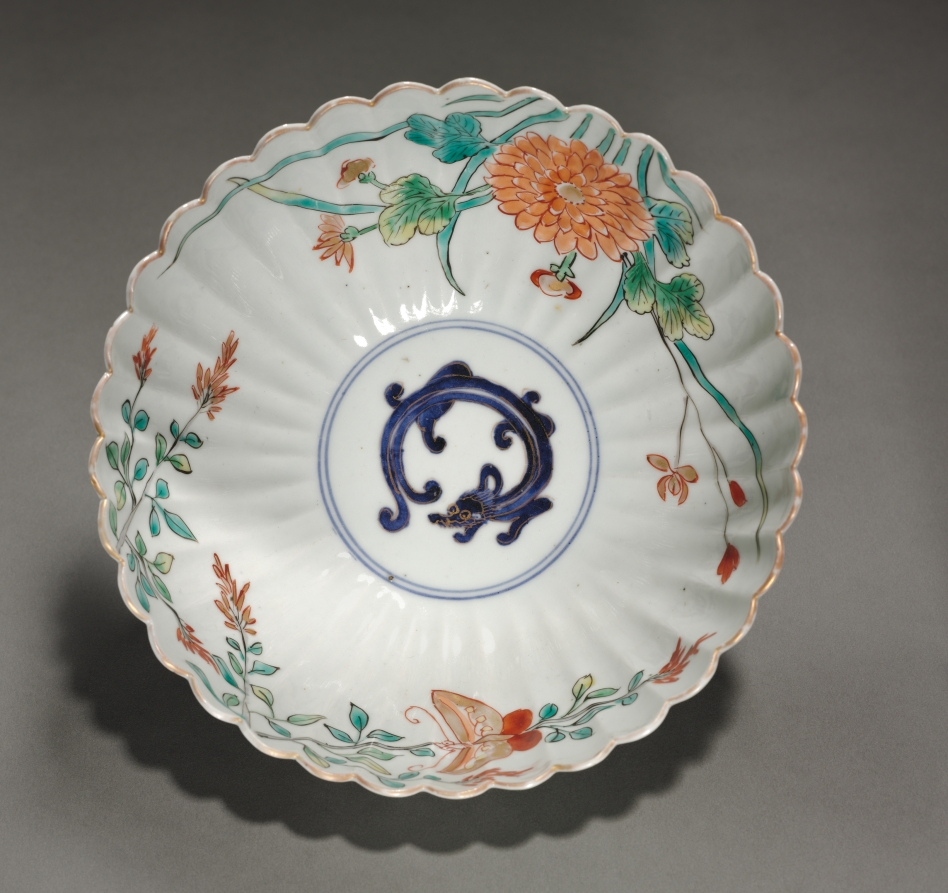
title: Fluted Bowl with Dragon, Butterfly, and Flowers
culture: Japan, Edo period (1615–1868)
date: early 1700s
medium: Porcelain with underglaze blue and overglaze color enamels and gold (Hizen ware, Kakiemon type)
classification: Ceramic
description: A dragon encircled by sprays of flowers and a butterfly enliven the interior of this fluted bowl. The exterior has similar decoration, with touches of gold on some petals. The flutes enhance both the visual and tactile experience; their tapered forms draw the eye from the edges inward and provide ridges for the hands.